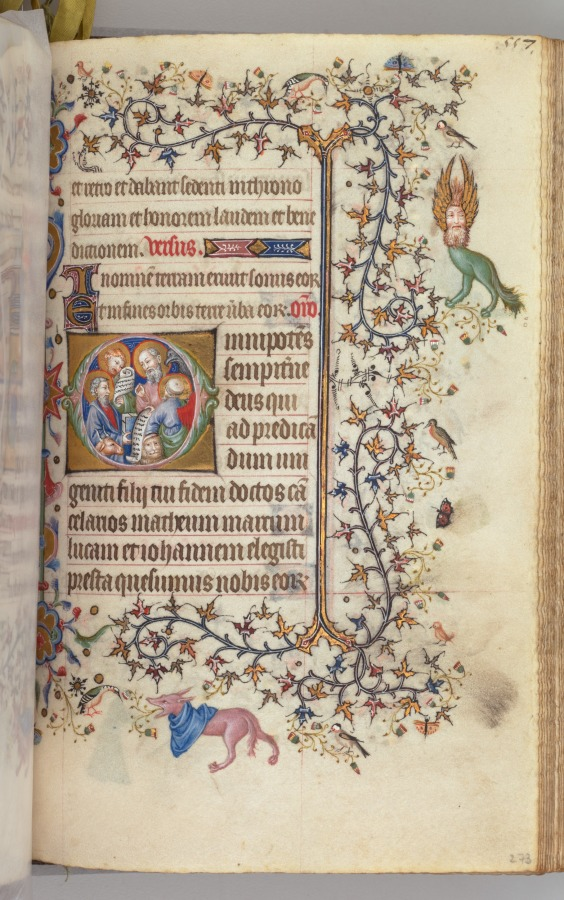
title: Hours of Charles the Noble, King of Navarre (1361-1425): fol. 273r, The Four Evangelists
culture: France, Paris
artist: Master of the Brussels Initials and Associates (French)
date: c. 1405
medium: ink, tempera, and gold on vellum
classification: Bound Volume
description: This precious volume was obviously highly prized by its owner, the French-born King of Navarre, who had his coat of arms painted on no less than twenty folios. Rather than directly commissioning this manuscript from a specific workshop, it seems that Charles the Noble acquired his book of hours -- perhaps ready-made for the luxury market -- while on a trip to Paris in 1404-05. A collaborative effort, six painting styles are evidenced within the pages of this codex, those of two Italians, two Frenchmen, and two Netherlanders. The painter who was responsible for the planning and decoration of the book, and who produced seventeen of the large miniatures, was a Bolognese artist known as the Master of the Brussels Initials. His principal assistant, responsible for most of the borders, was a Florentine who signed his name "Zecho" da Firenze on folio 208 verso.